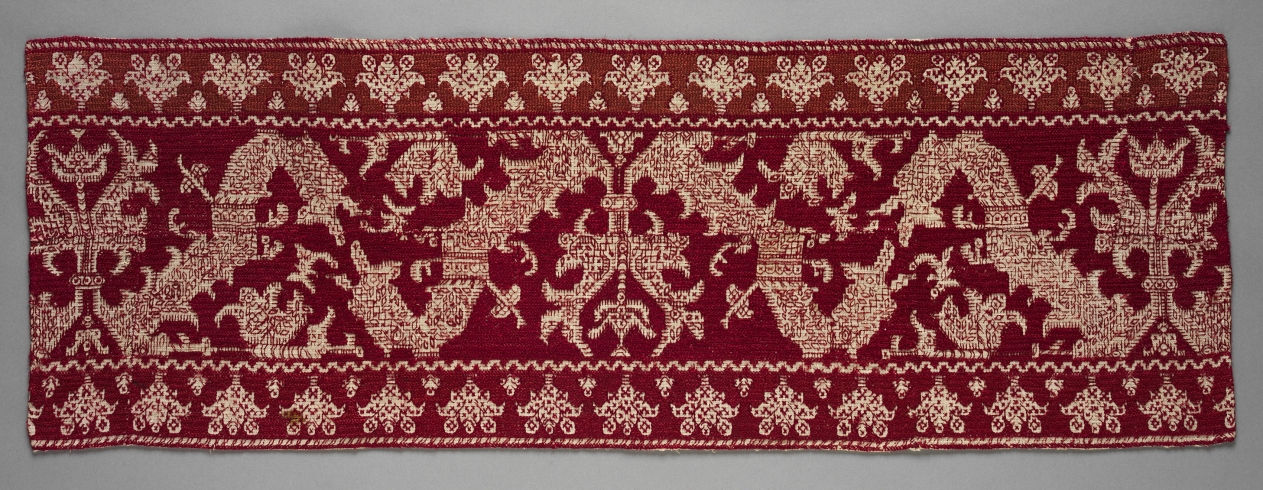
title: Fragment of a furnishing textile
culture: Africa, North Africa, Morocco, Azemmour, Moroccan embroiderer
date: possibly 1700s or 1800s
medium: Linen, silk, and dye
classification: Embroidery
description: Small bands like this decorated furnishings. They are distinctive to Azemmour, Morocco, where Jewish women embroidered them at home. This band’s red designs are floral and geometric; the scrolls may be abstracted dragons. Its Renaissance-era motifs reflect centuries of cross-Mediterranean exchange (especially with Portugal, which ruled Azemmour from 1513 to 1541). Such designs traveled to North Africa via printed pattern books. Patterns were transferred onto fabric, then the backgrounds were covered with filling stitches: plait and cross-stitches were used here. The production of these embroideries ceased around the mid-1900s because of cost and changing fashions.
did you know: This textile represents the work of at least four individuals: the person who prepares the fibers, the weaver, the dyer, and the embroiderer.